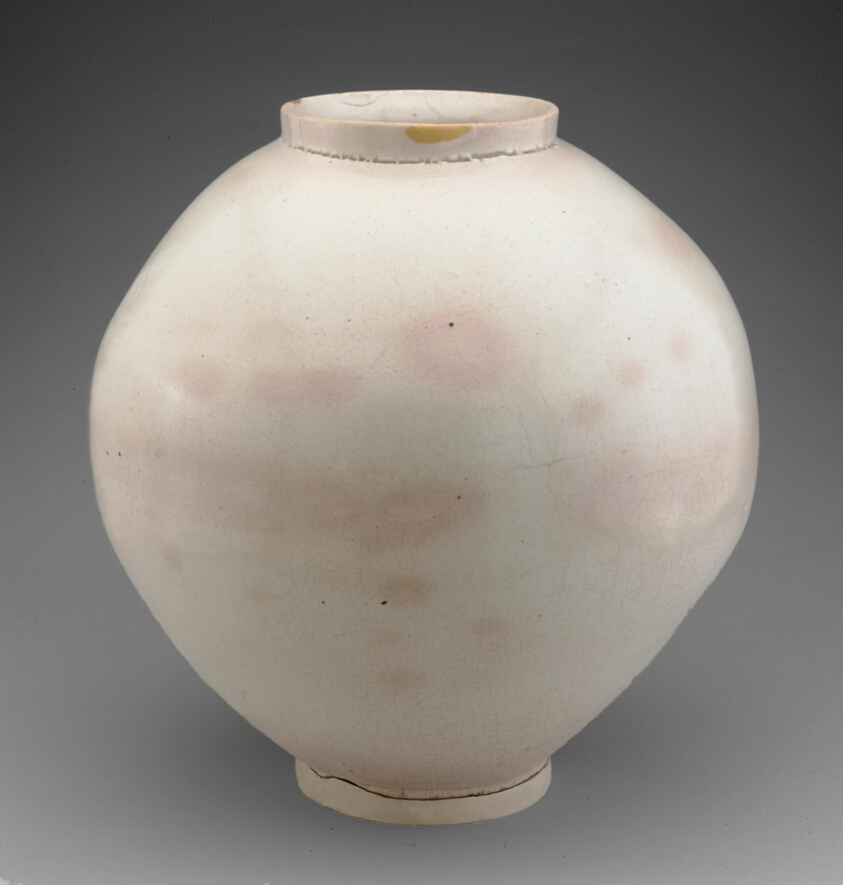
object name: Vessel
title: Moon Jar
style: Korean (culture or style), chosen, East Asian, asian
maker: Korea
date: Joseon dynasty (1392–1897), late 17th– mid-18th century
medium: Porcelain with glaze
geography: Korea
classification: porcelain; ceramics; asian art; vessel